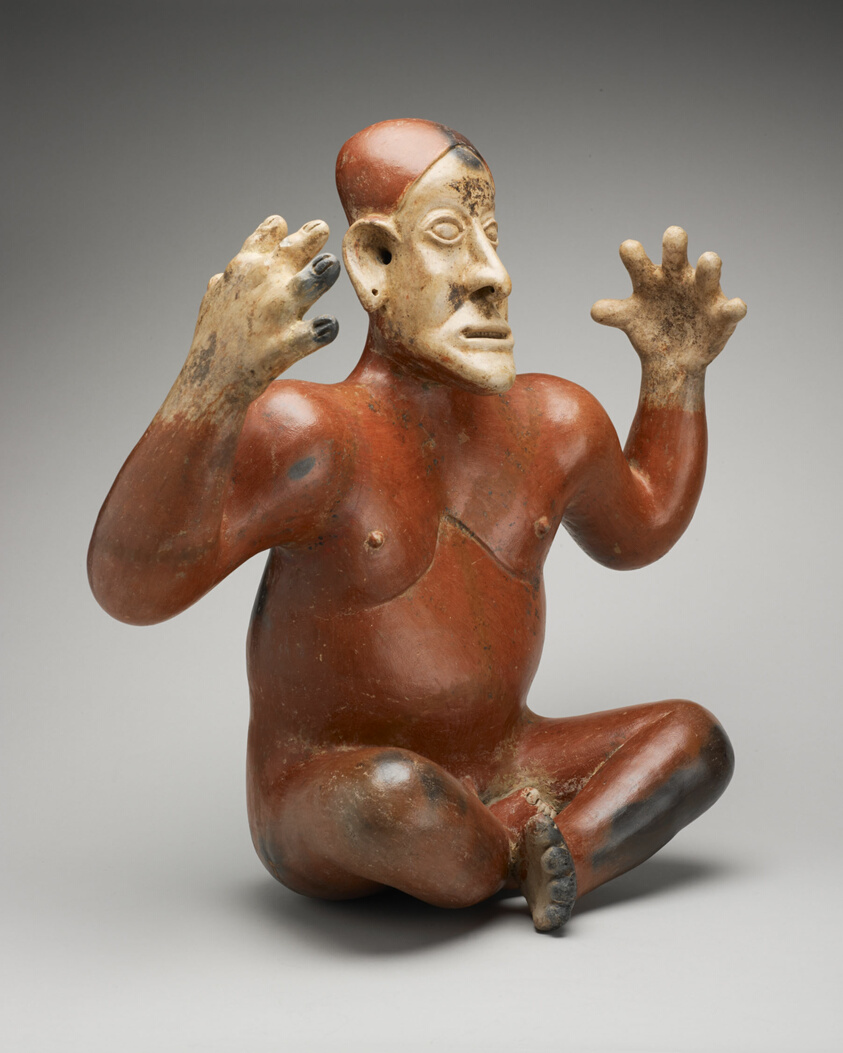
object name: Sculpture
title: Storyteller Figure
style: jalisco, ameca-zacoalco, mesoamerican, Pre-Columbian, americas, west mexico, ameca, Arts of the Americas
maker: Jalisco (Ameca Valley, Jalisco, Mexico)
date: 100–800 CE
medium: Ceramic and pigment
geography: Jalisco state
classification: ceramics; earthenware; sculpture; art of the americas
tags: people, ancestors, gestural, leaders